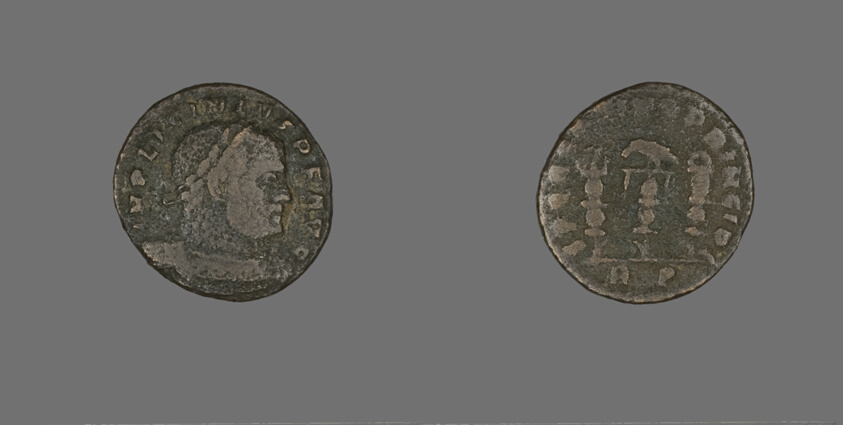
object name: Coin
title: Coin Portraying Emperor Licinius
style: roman (ancient, style or period), ancient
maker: Roman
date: 307-324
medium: Bronze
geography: Roman Empire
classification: coin; ancient art